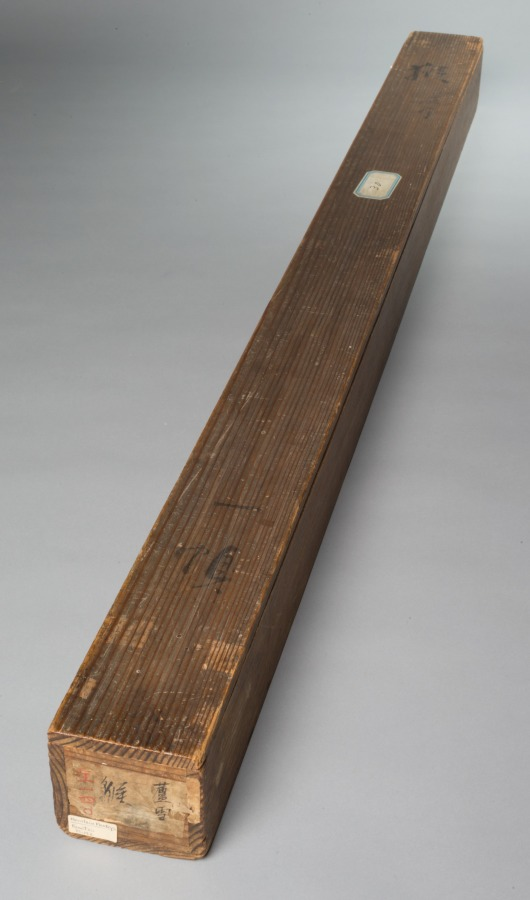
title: Monkeys by a Stream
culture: Japan, Edo period (1615–1868)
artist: Nagasawa Rosetsu (Japanese, 1754–1799)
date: c. 1796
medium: hanging scroll; ink and color on paper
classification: Painting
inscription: Inscription: 平安蘆雪寫意; Transliteration: Heian Rosetsu shai; Sealed: 魚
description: The two monkeys in this painting are Japanese macaques. The one in front dangles its left leg over a sharply angled rock, surveying the land beyond a fast-moving mountain stream. A smaller monkey sits behind it, looking directly ahead as if it realizes it is being watched. The artist used just a few highly contrasting warm and cool colors, sweeping brushstrokes over ink washes, and loose lines to create a scene that powerfully evokes the mentally engaged state of the two animals.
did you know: Monkeys, which are found throughout the mountainous and wooded areas of Japan, became a favorite subject of many later Japanese artists.